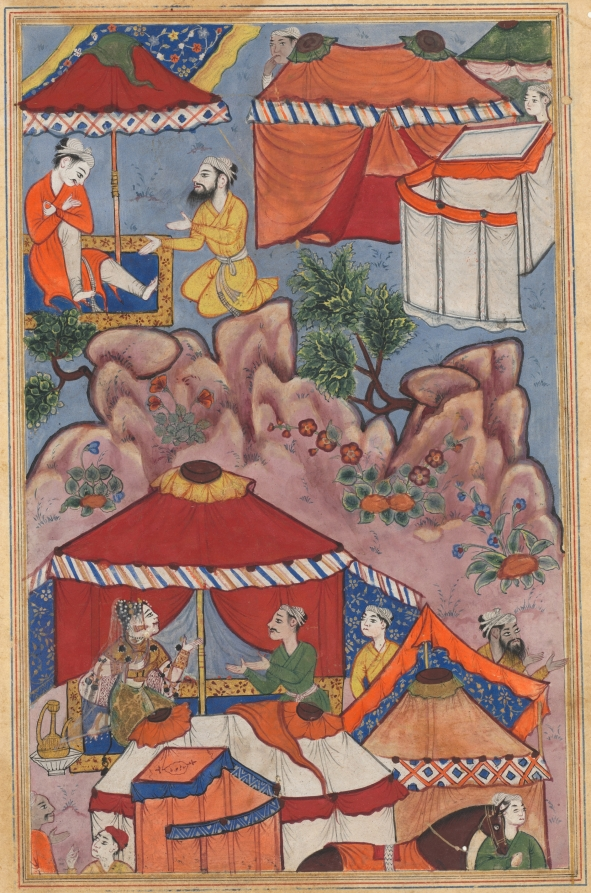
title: Bashir confides his love for Habbaza to an Arab friend, and sends him to her with a message, from a Tuti-nama (Tales of a Parrot): Twenty-fourth Night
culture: Mughal India, court of Akbar (reigned 1556–1605)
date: c. 1560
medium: gum tempera, ink, and gold on paper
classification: Painting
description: In the upper register, Bahir, dressed in orange, conveys a message to his friend for his lover Habbaza. Habbaza herself, who is married to another man, waits for the message in her tent. Other villagers appear throughout the painting, some gesturing in surprise, signaling how news of the clandestine affair spread among the people of Habbaza’s tribe.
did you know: Bahir’s friend, wearing yellow, appears both in the upper register and outside Habbaza’s tent.